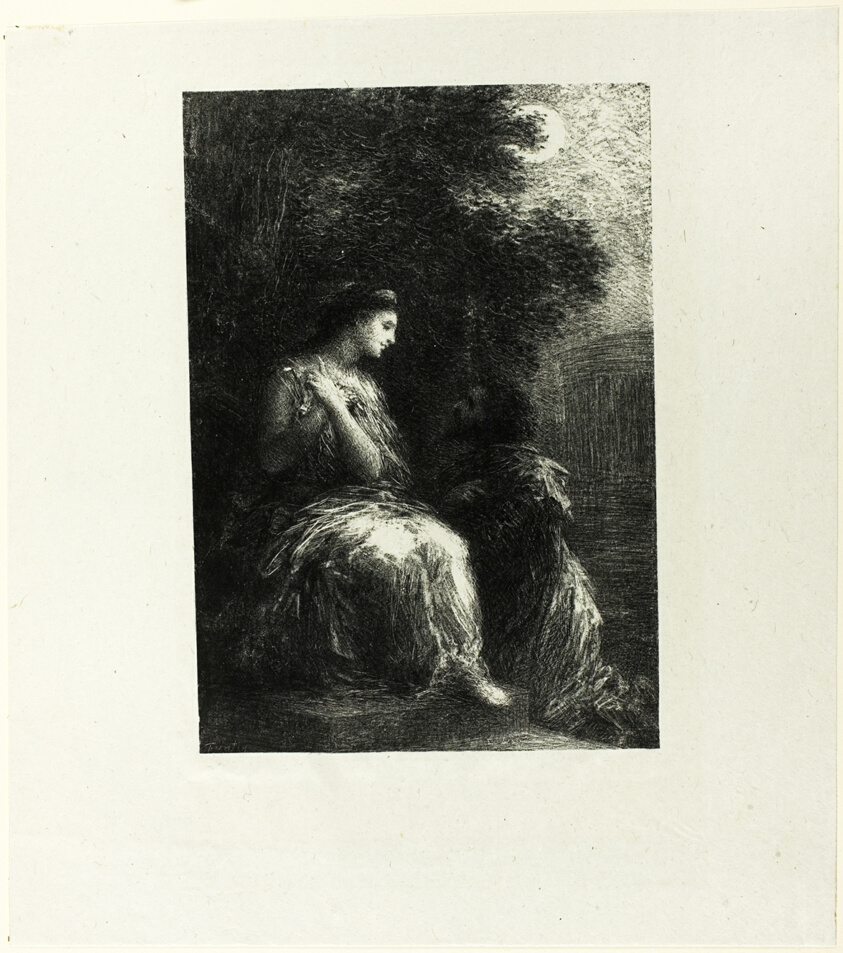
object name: Print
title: Duet of the Trojans, seventh plate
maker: Henri Fantin-Latour (French, 1836-1904)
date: 1903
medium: Lithograph in black on light gray chine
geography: France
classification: lithograph; print; prints and drawing